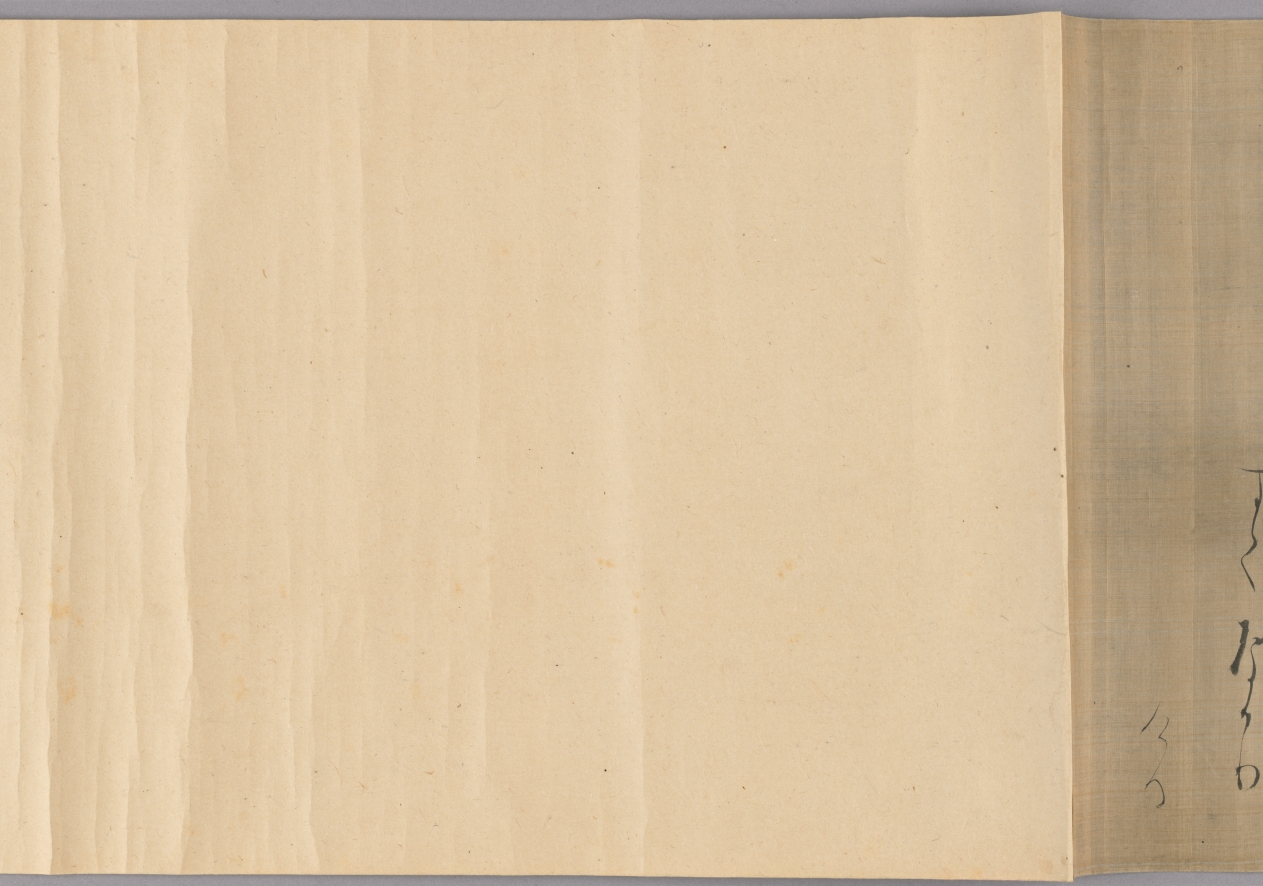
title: Selections from the Collection of Japanese Poems from Ancient and Modern Times (Kokin wakashū) with Design of Pines Along the Shore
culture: Japan, Momoyama period (1573-1615) to Edo period (1615-1858)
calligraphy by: Hon'ami Kōetsu (Japanese, 1558–1637)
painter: attributed to Tawaraya Sōtatsu (Japanese, c. 1570–c. 1640)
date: 1600s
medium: handscroll; ink on silk with gold and silver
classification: Calligraphy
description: The calligrapher and craftsman Hon’ami Kōetsu frequently collaborated with Tawaraya Sōtatsu, a painter who ran a studio that produced fans and screens. Sōtatsu’s work featured abstracted and flattened shapes, fields of color and gold, and asymmetry. In particular, motifs that appeared in small scale, such as flora and fauna, in early decorated Japanese papers were painted in a larger scale—blown up as if seen under a magnifying glass. For this handscroll, Kōetsu brushed poems from the autumn section of a poetry anthology onto silk with a landscape of pines in gold and silver likely painted by Sōtatsu.